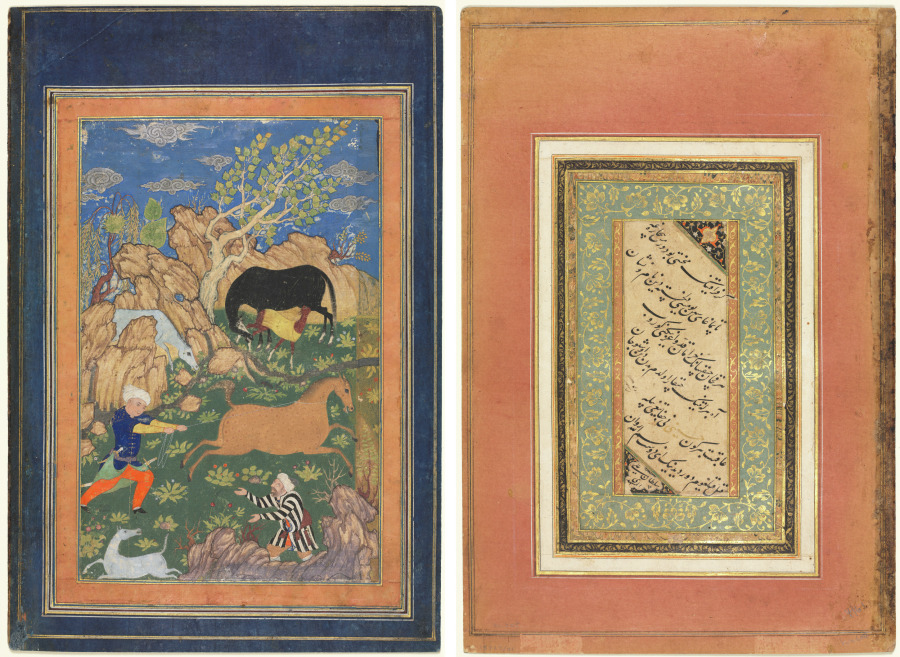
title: Rustam Lassoing his Horse, Rakhsh, in a Landscape (recto); Calligraphy, Persian Verses (verso)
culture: Afghanistan, Herat, Timurid period (1370–1501)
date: late 1500s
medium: opaque watercolor, ink, gold and silver on paper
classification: Manuscript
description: The handsome youth lassoing the feisty colt in this painting is Rustam, the Shahnama's most popular hero. A favorite episode for artists, this event marks a turning point in the fortunes of Iran and offers a wonderful pictorial opportunity. It occurs in a time of trouble for Iran—the throne is empty and a foreign army has invaded the land. The country needs a mighty warrior to fight for her, and the young Rustam is ready for the challenge—once he finds a horse that can bear his enormous weight! The herds are gathered for Rustam's inspection: a piebald bay colt catches his eye. For three years no one has been able to capture the colt, known as "Rustam's Rakhsh." Rustam asks what price the herdsman wants for him. The reply: "If you are a true Rustam—a true 'deliverer'—mount him and make the land of Iran aright. The cost of Rakhsh is the soil of Iran and the deliverance of the world!"